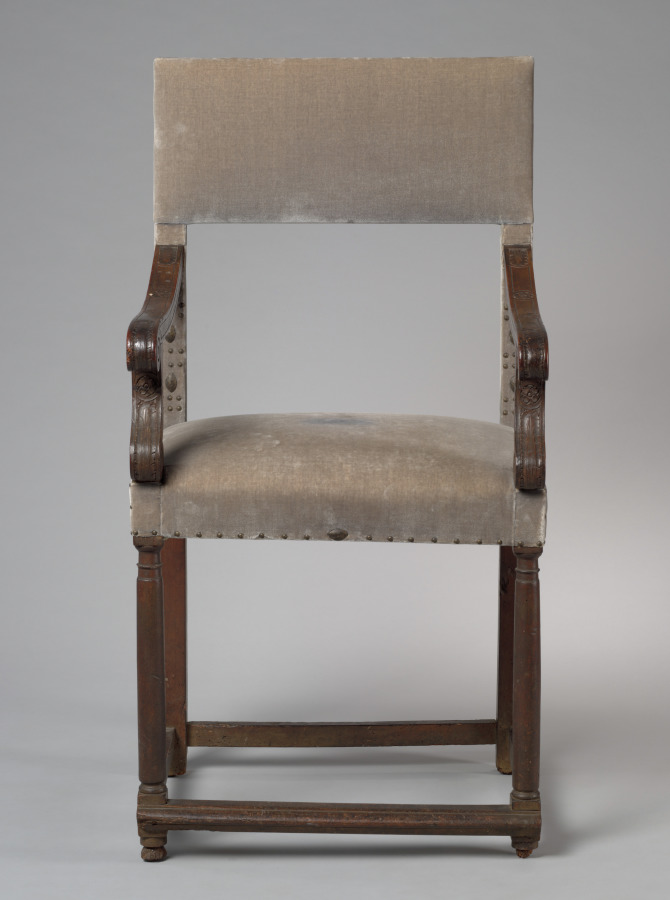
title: Armchair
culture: France, Henri II style, 16th century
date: 1500s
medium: walnut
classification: Furniture and woodwork